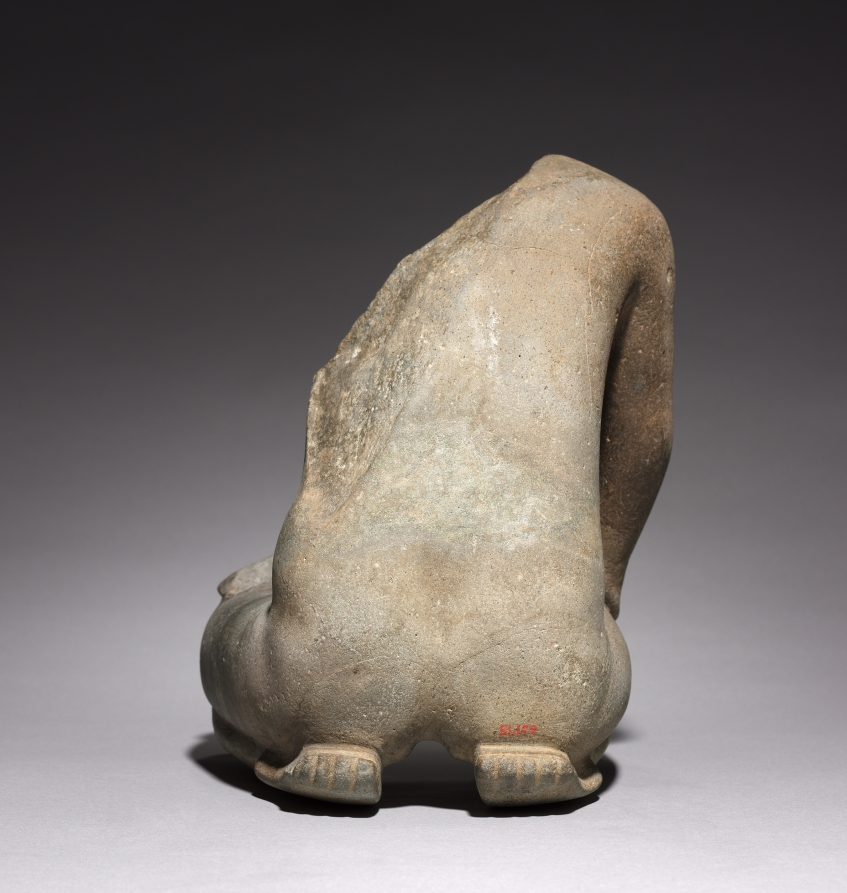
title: Kneeling Figure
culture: Mexico, Guerrero, Olmec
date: c. 1200–600 BCE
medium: stone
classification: Sculpture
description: Outside of the Maya, Olmec sculptures of humans have a naturalism unknown in other Mesoamerican artistic traditions. On this finely carved figure, the musculature of the arms, torso, and legs is carefully depicted, and even the fingernails and toenails and are shown.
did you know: An observant traveler discovered the left knee and hand fragment, orginally missing and now reunited.